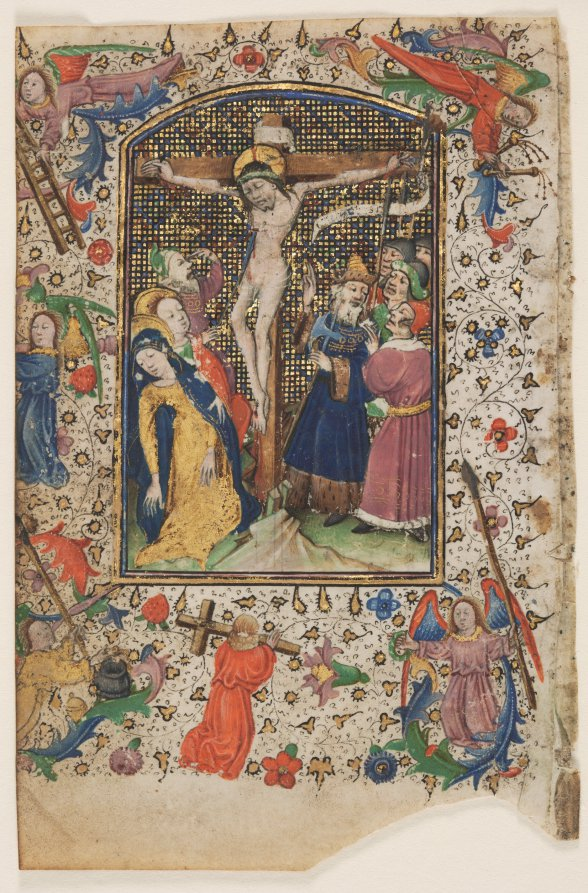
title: Leaf from a Book of Hours: The Crucifixion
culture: Flanders, Ghent?, 15th century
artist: Master of Guillebert de Mets (Flemish)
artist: and Workshop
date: 1430s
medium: ink, tempera and gold on vellum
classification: Manuscript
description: The Master of Guillebert de Mets is named after the scribe who records his name in an illuminated copy of the Decameron, made for Duke Philip the Good of Burgundy, and for which he contributed many of its miniatures. He was active from about 1410 to 1445. So far there is no proof that allows us to follow his career or to know precisely where he worked. Calendars in other manuscripts with which he is associated suggest his shop may have been in Tournai, Liège, Bruges, and more credibly, Ghent. His commissions may have been linked to the itinerant Burgundian court, though no original provenance survives for any of his manuscripts. The Master of Guillebert de Mets painted in an easily recognizable style. His figures have prominent heads with well-delineated eyes and small mouths, slender torsos with thin, spindly legs, and long, finely worked fingers. Many of his miniatures, such as The Crucifixion and The Last Judgment here, show that he often favored mosaic backgrounds of delicately worked checkered patterns.